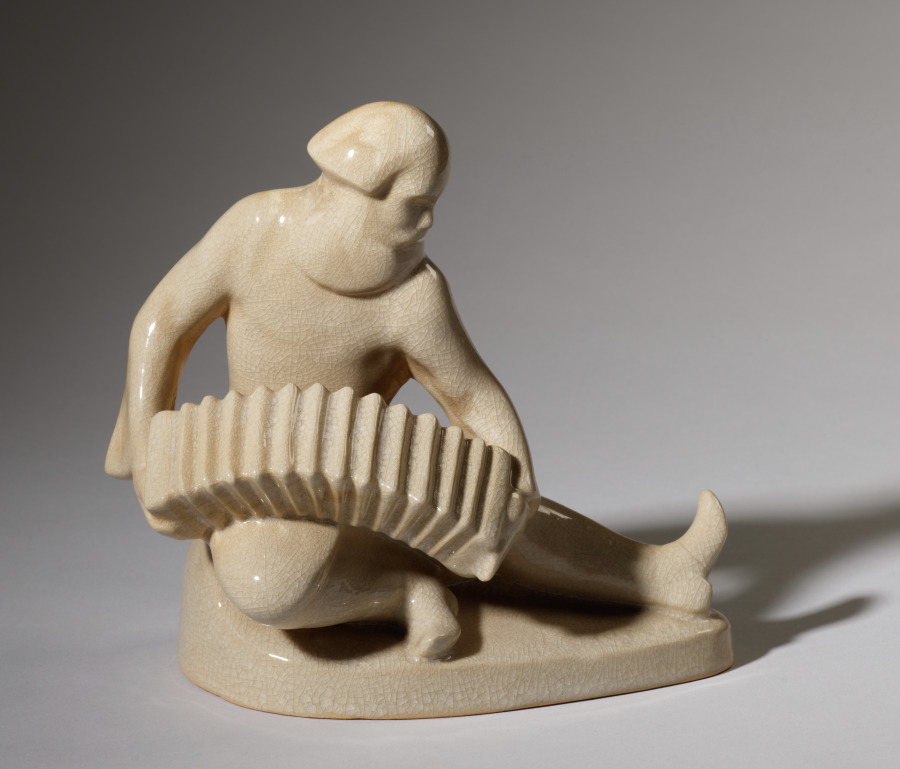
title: Accordion Player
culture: America, Ohio, Cleveland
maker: Cowan Pottery Studio (America, Rocky River, Ohio, 1920–1931)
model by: Alexander Blazys (American, born Russian Empire [now Lithuania], 1894–1963)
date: 1927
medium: mold-made ceramic, glazed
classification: Ceramic